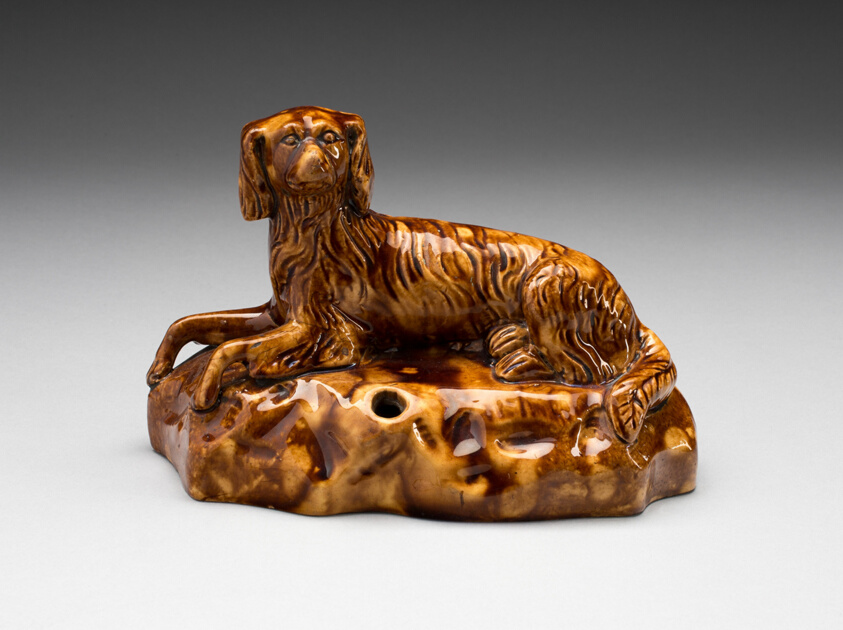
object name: Decorative Arts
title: Inkstand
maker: Possibly East Liverpool Pottery; American, 1844–1939; East Liverpool, Ohio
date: 1850–80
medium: Earthenware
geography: East Liverpool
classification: writing equipment; american decorative arts; american arts; ceramics; decorative arts